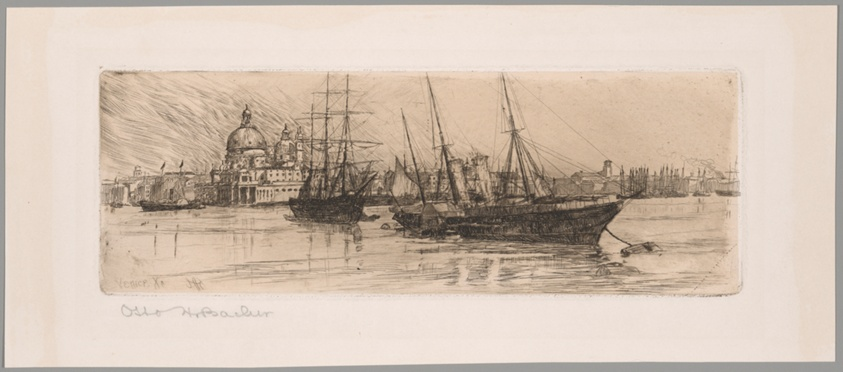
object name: Print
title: Two Boats, Venice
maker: Otto Henry Bacher (American, 1856-1909)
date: 1880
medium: Drypoint in black on cream Japanese paper, laid down on ivory wove paper (chine collé)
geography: United States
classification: prints and drawing; paper; print; drypoint